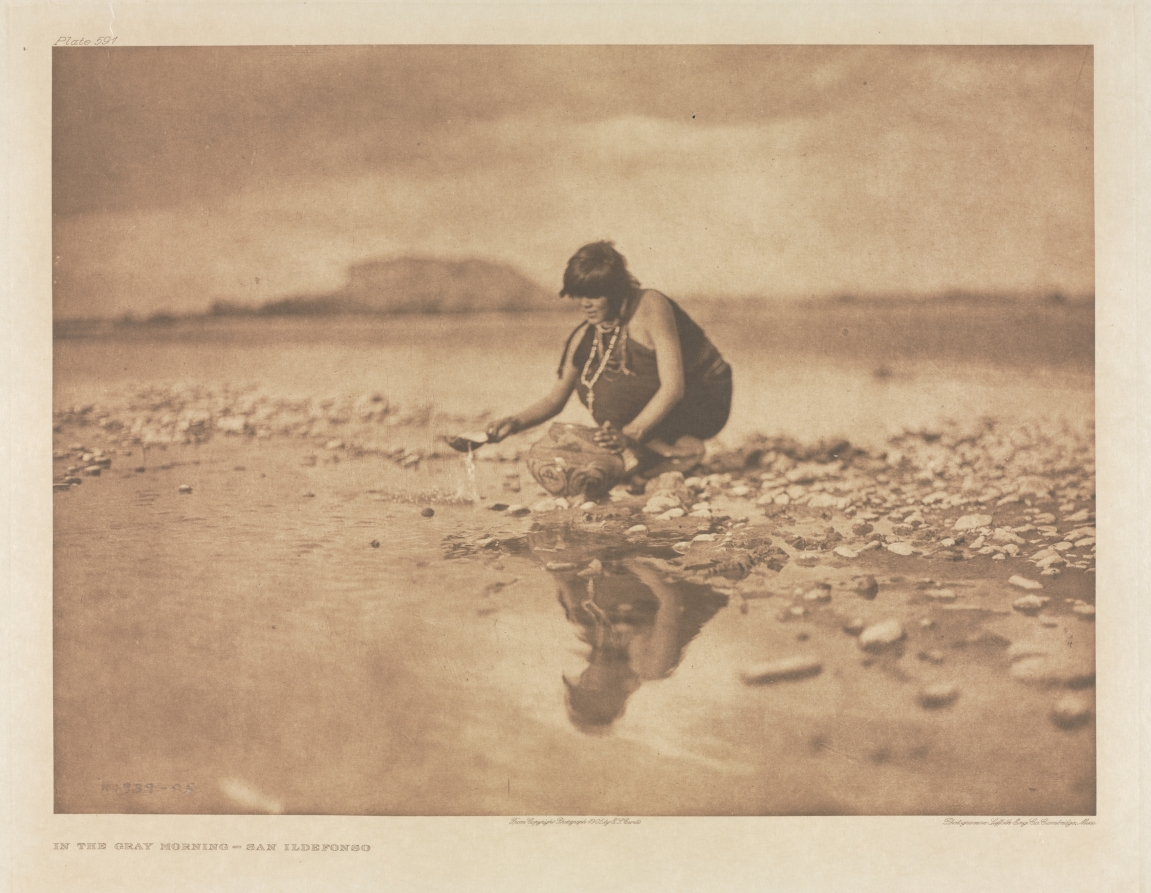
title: Portfolio XVII, Plate 591: In the Gray Morning - San Ildefonso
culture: America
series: The North American Indian: being a series of Portfolios picturing and describing the Indians of the United States, the Dominion of Canada, and Alaska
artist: Edward S. Curtis (American, 1868–1952)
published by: The University Press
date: 1905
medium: photogravure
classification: Portfolio